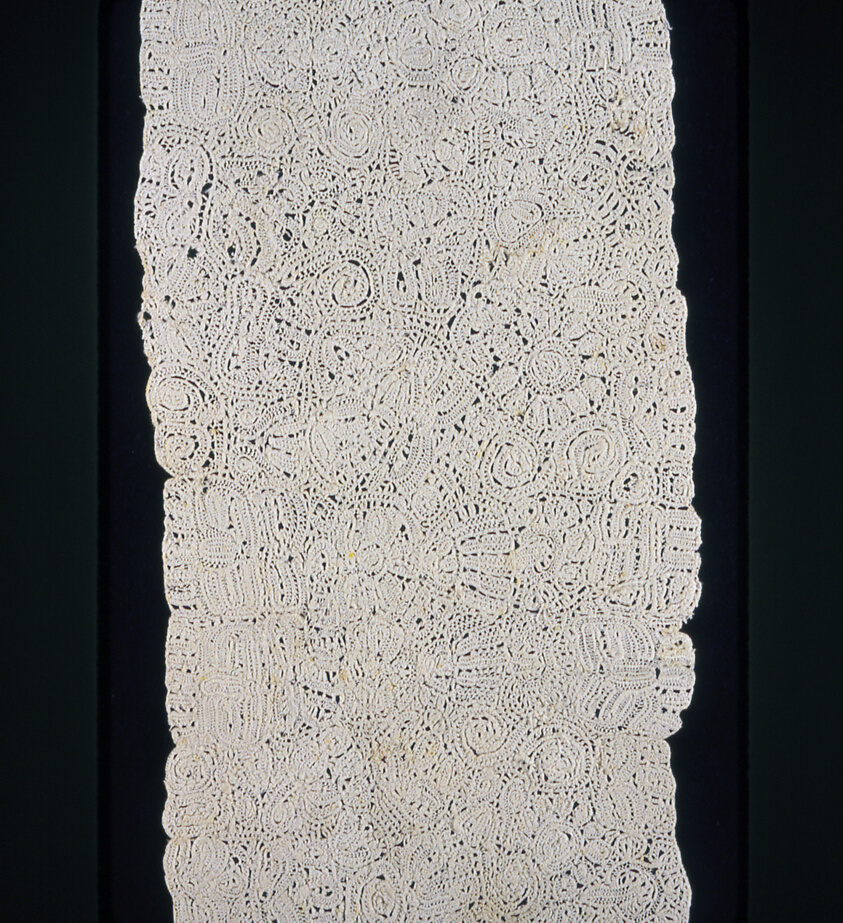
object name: Textile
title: Border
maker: Probably Northern Germany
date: 1650/1700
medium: Linen, needle lace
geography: Northern Germany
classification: textile; lace - needle